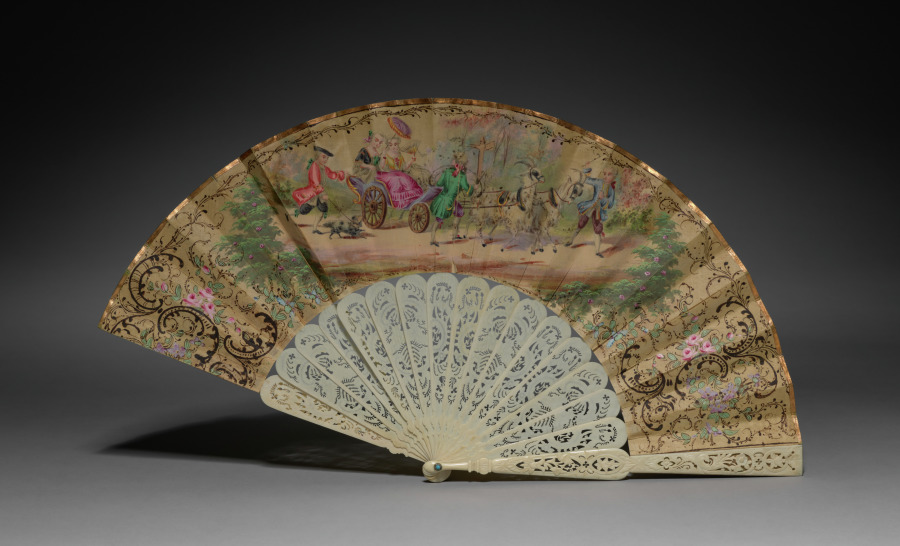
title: Fan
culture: Europe, mid-19th century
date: mid 1800s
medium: ivory with gilding, painted and gilt paper, painted silk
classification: Miscellaneous